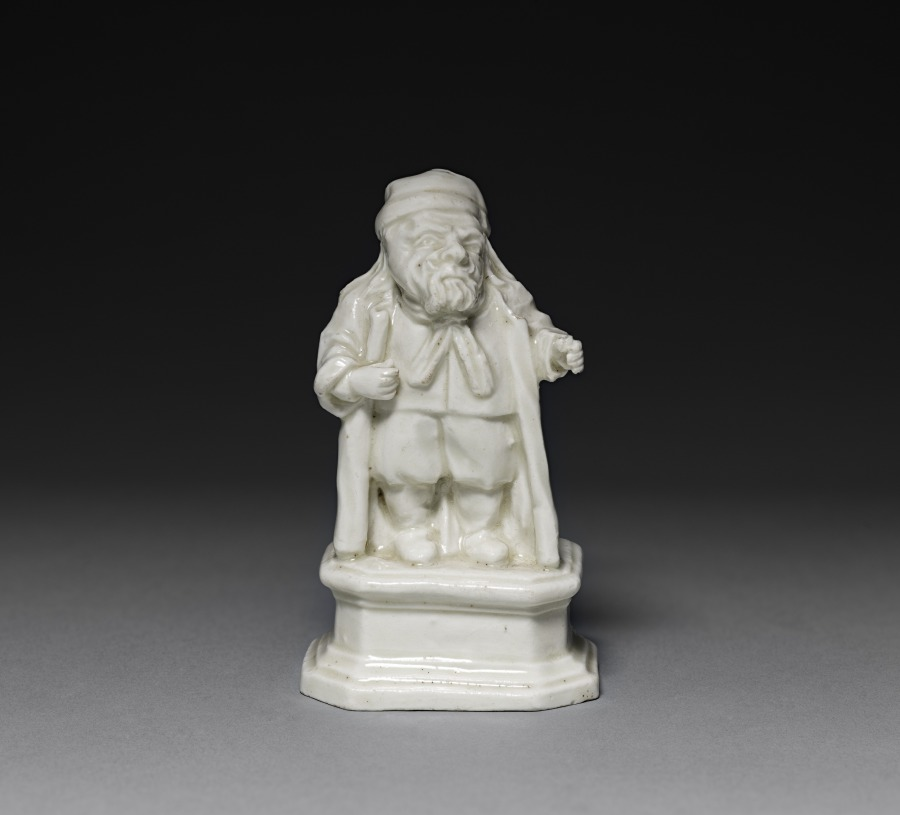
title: Callot Figure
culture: Germany, Meissen, 18th century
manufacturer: Meissen Porcelain Factory (German, est. c. 1710)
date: c. 1720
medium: porcelain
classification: Ceramic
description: This small figure is made of the slightly yellowish porcelain developed by Böttger and used by the Meissen factory during the first decade of its existence. It is one of a series of small figures adapted from engravings in the style of Callot and is thought to have been modeled by Georg Fritzche, who had been employed at Meissen since 1712.